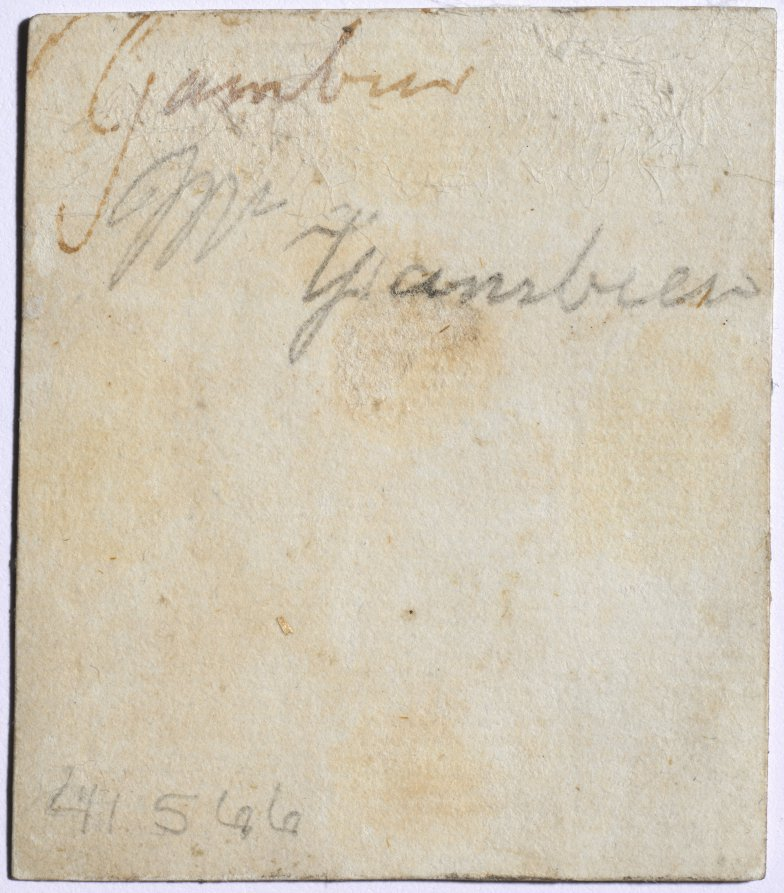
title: Portrait of Mr. Gambier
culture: England, 18th century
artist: John I Smart (British, 1741–1811)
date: c. 1776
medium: graphite and wash on laid paper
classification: Portrait Miniature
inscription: Signature: none; inscribed in graphite on front of paper at upper right corner: [?][?]2; inscribed on paper backing: in graphite, upside down at upper left: 15; in graphite, on a slant at left center to upper right: Mr. Fitzherbert; inscribed on back of paper in graphite: Mr. [Gambier]; inscribed in brown ink: Gambier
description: Although it is impossible to say if it was always part of the artist’s process to execute a preparatory sketch prior to painting each miniature, we do know that John Smart retained many hundreds of these sketches. A group of preparatory sketches—of which this portrait is one—descended through the Smirke family after Smart’s daughter Sarah gave a sketchbook containing preparatory portrait studies to her friend Mary Smirke, sister of the celebrated Victorian architect Sydney Smirke. This book was probably broken up around 1877 when it was divided between Sydney’s daughters Mary Jemmett and Mrs. Lange, whose portions were both sold at auction in 1928. G. C. Williamson was the first to suggest that Smart’s sketches were well known and that they were preparatory studies for the painted miniatures. Williamson listed the names of sitters from the sketches known to him at the time, and they include Mr. Fitzherbert, the identification formerly given to the sitter in this portrait. Here, the sitter’s head and shoulders are facing left. He has brown eyes and wears his powdered hair en queue. His coat has a narrow collar, under which he wears a high stock collar and frilled vest. The color of his attire is not suggested, and the background remains unpainted. Though long catalogued as Mr. Fitzherbert, the portrait was likely mistakenly designated as such at a later date. There has been confusion regarding several miniatures called Mr. Fitzherbert, which may or may not be related. There was a sketch of a different Mr. Fitzherbert in the Jemmett sale of February 29, 1928; another in the Burton-Jones collection by the 1940s; and a miniature of a Mr. Fitzherbert portrayed nearly full face and dated 1771 was sold at Sotheby’s, London, on August 1, 1934 (lot 73). The present location of these unpublished miniatures is unknown, as is their credibility as portraits of the Mr. Fitzherbert that Smart is known to have painted. When the paper backing of the Cleveland miniature was removed in 1993, the name Gambier was discovered inscribed in graphite and pen on the back. This miniature relates to a portrait of a man on ivory dated 1774, formerly in the Ashcroft collection and at one time on loan to the Victoria and Albert Museum. It was sold at Sotheby’s, London, on May 7,1946 (lot 61) and catalogued as a “miniature of a young man, by John Smart, signed and dated, head and shoulders three-quarters sinister, gaze directed at spectator, fair hair en queue, in white cravat, frilled vest and rich red coat, 1 3/8 in.” The size of the portraits correspond, though the ivory miniature represents less of the figure than is seen in the sketch and is therefore smaller. While the color red for the coat is not indicated in the sketch, Smart often left the dress of his male sitters plain in preparatory sketches. Thus, this currently unlocated miniature on ivory can be identified as Mr. Gambier. Research into the identity of this gentleman is ongoing.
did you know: Sketches helped John Smart work out the particulars of a portrait before commencing the miniature on ivory; they were useful in the event that a duplicate might later be required.